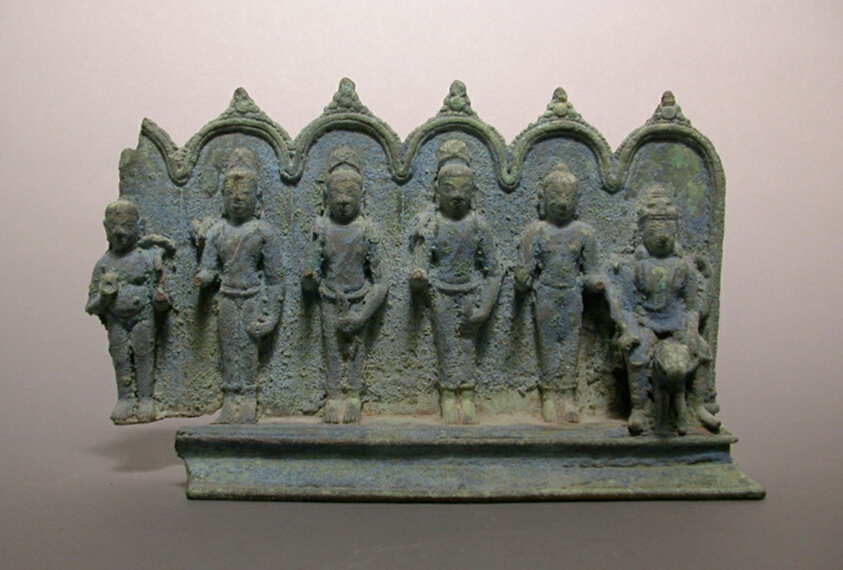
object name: Sculpture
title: Fragment of a Tableau with Avatars of Vishnu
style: South Asian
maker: Bangladesh; Chittagong province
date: Pala period, 9th/10th century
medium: Bronze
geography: Bangladesh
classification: bronze; metal; sculpture; asian art